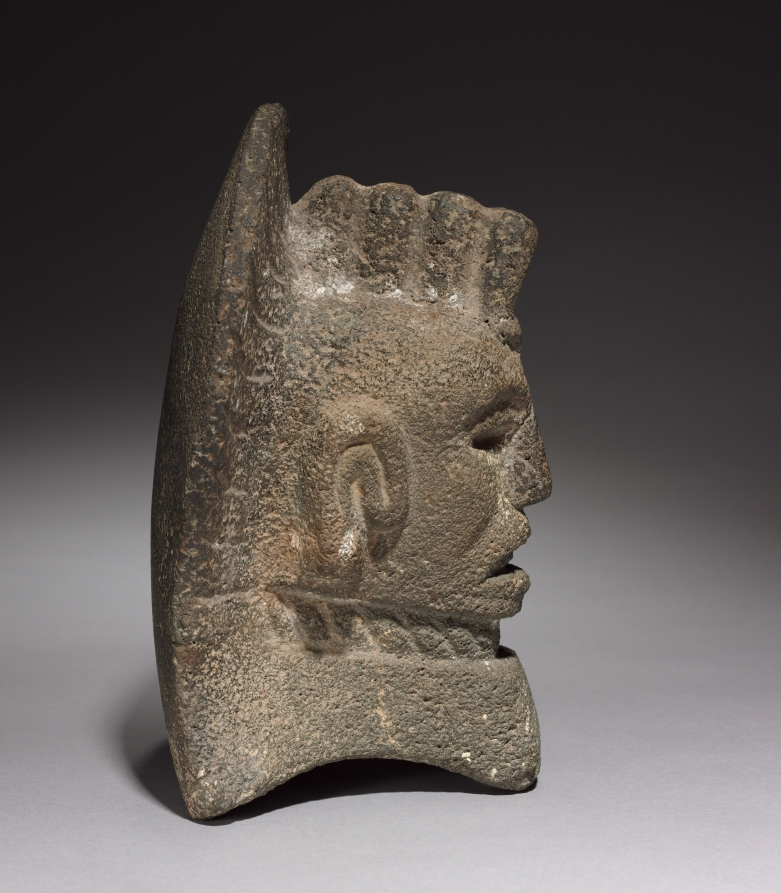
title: Head Palma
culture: Mexico, Veracruz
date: 600–1000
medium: gray volcanic stone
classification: Sculpture